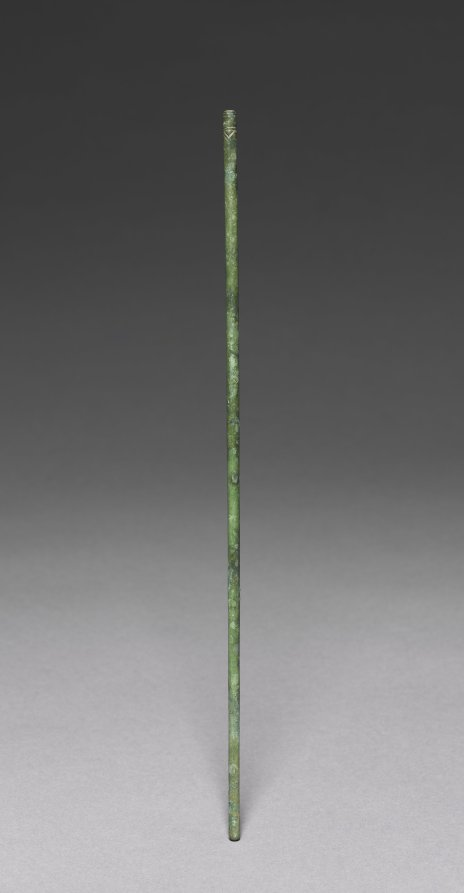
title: Chopstick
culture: Korea, Goryeo dynasty (918–1392)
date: 918–1392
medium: bronze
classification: Metalwork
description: In Korea, chopsticks made of metal such as brass, silver, and gold were excavated from ancient tombs and ruins dated to the 6th century at the earliest. Burial goods often include utilitarian objects such as table wares and utensils because the dead were believed to need them in the afterlife.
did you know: Nowadays Korean still prefer metal chopsticks (stainless steel and brass) to wooden ones.